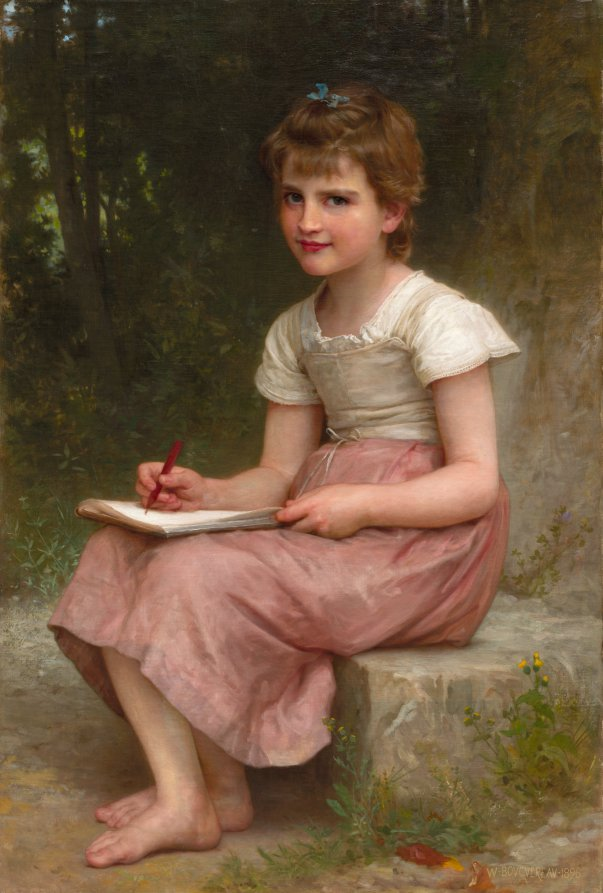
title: A Calling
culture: France, 19th century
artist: William Adolphe Bouguereau (French, 1825–1905)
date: 1896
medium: oil on fabric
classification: Painting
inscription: Signed lower right: w. bouguereau 1896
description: Seated on a stone step in the countryside, a young girl has realized that her calling in life is to be an artist. Bouguereau was famous for his innovative depictions of children. In 1900 a critic wrote, "[F]ew artists have represented childhood with more tenderness, charm, and spirit than Bouguereau . . . [H]e has invented the most picturesque, the most pleasing, the most original scenes of an almost endless variety." Bouguereau was no less famous for his remarkably life-like images. Here he convincingly captures the girl's rough clothing, soft skin, and intense gaze. Bouguereau painted this work in La Rochelle, a harbor city on France's west coast. During the later years of his life, Bouguereau—by then wealthy and famous—made a habit of spending summers in La Rochelle. There the artist lived in a mansion he owned near the port, working in a greenhouse he had converted into a studio or in the countryside. While in La Rochelle, Bouguereau chose his models from among farm workers, families of local fishermen, or his own servants.